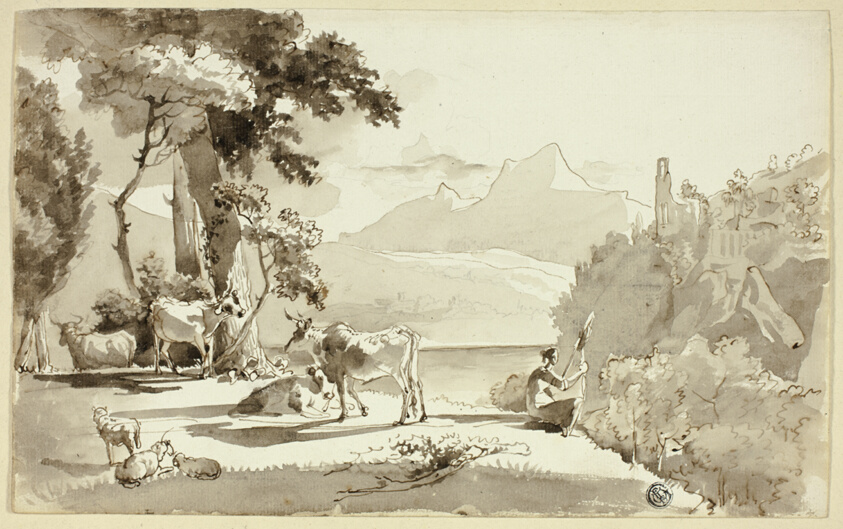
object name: Drawing and Watercolor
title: Pastural Landscape with Woman Spinning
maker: Juan Cristobal (Spanish, active 1584-1594)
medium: Pen and brown ink, and brush and brown wash, with graphite, on ivory laid paper, tipped on cream wove paper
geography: Spain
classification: ink or chalk wash; drawings (visual works); prints and drawing